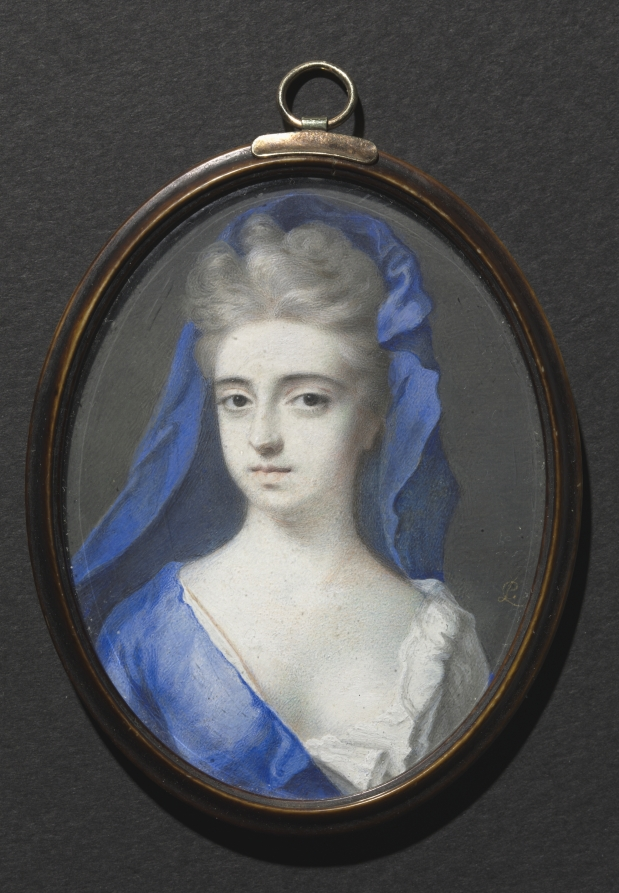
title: Portrait of a Woman in Blue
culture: England, early 18th Century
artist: Peter Cross (British, c. 1645–1724)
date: c. 1700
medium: watercolor on vellum in original ivory frame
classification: Portrait Miniature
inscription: signed right: PC [monogram]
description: Living in London, the youngest of seven children, Peter Cross was probably apprenticed to a limner following the death of his wealthy father. His first miniatures date from around 1661, and he remained active until his death, ushering the medium into the eighteenth century; the greatest British miniaturists working during his lifetime, all had died or ceased to work by 1700. Although ivory had been adopted as a support for British miniature painting a decade before his death, Cross exclusively used the older medium of vellum adhered to card. The artist was also an avid collector, assembling an impressive group of miniatures that included at least twelve works by his neighbor Samuel Cooper. This collection was sold in 1722 at Cross’s house in Covent Garden. Cross’s style is distinguished by a fi ne stippling of colors that combine to create soft, voluminous hair and pale flesh tones. His later works tend to leave the prepared white ground of the vellum bare—coincidentally, a strategy that was adopted by artists painting miniatures on ivory to exploit the support’s translucence. The details of his early instruction are still obscure, but some scholars have postulated that Cooper trained Cross, whereas others note a greater resemblance to the style of Hoskins, and still others detect a similarity to French stippling and suggest that he may have been trained overseas. The artist depicted the unknown sitter almost full face before a plain gray background with her head turned slightly to the right. She dons a white gown trimmed with ruffles at the neckline and a bright blue mantle over her right shoulder. Her powdered hair is swept up and loosely covered either by the blue mantle or a scarf of the same color.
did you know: This miniature is in its original ivory frame, stained a mottled brown to imitate tortoise shell.